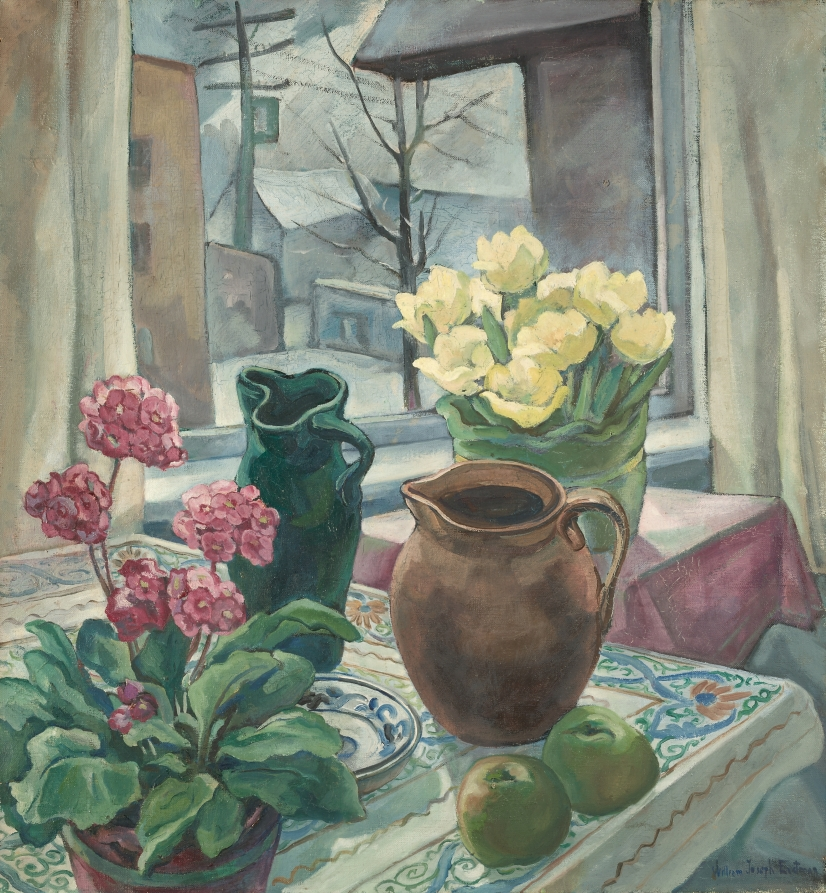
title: The Studio Table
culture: America, Ohio, Cleveland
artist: William Joseph Eastman (American, 1888–1950)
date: 1926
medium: oil on canvas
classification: Painting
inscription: signed lower right: William Joseph Eastman